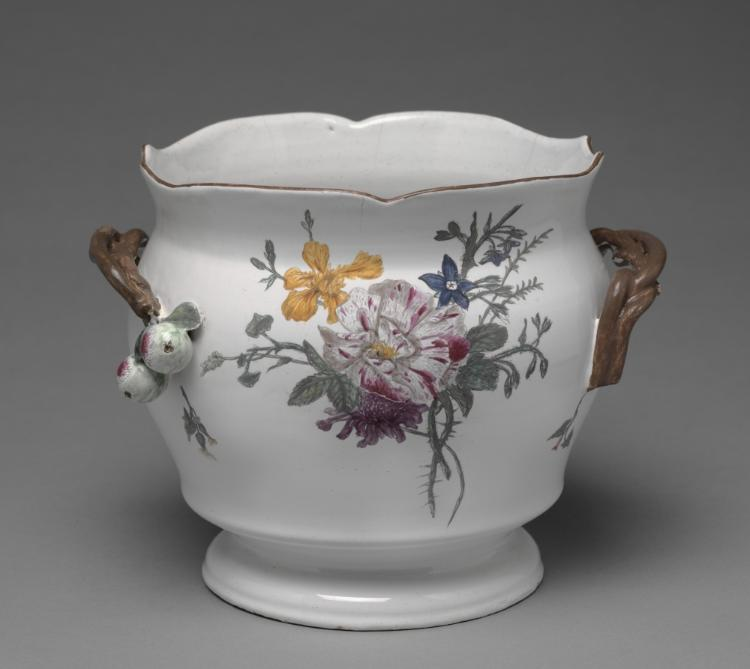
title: Wine Cooler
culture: France, Marseilles, 18th century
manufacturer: Joesph- Gaspard Robert Factory (French)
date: c. 1760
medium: tin-glazed earthenware (faience) with enamel decoration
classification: Ceramic